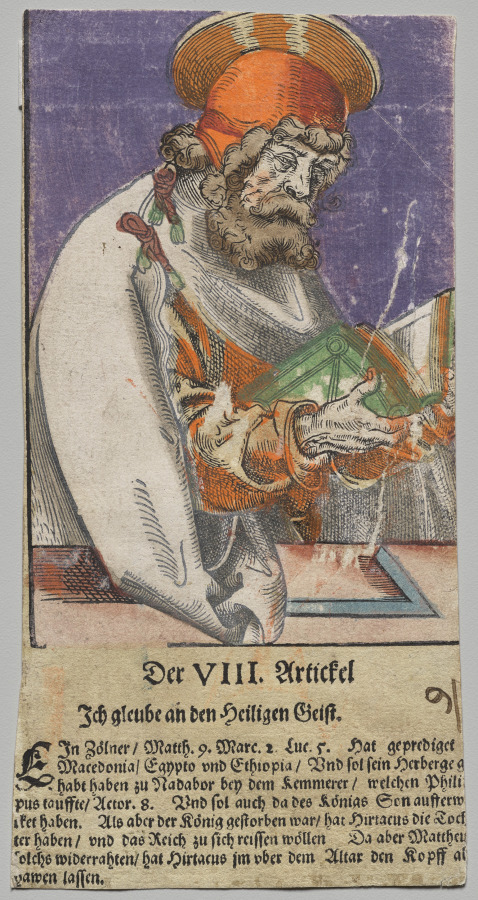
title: Matthew from Christ, the Apostles, and Saint Paul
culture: Germany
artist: Lucas Cranach the Elder, After (German, 1472–1553)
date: 1563/64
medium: Woodcut with letterpress text, hand colored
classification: Print